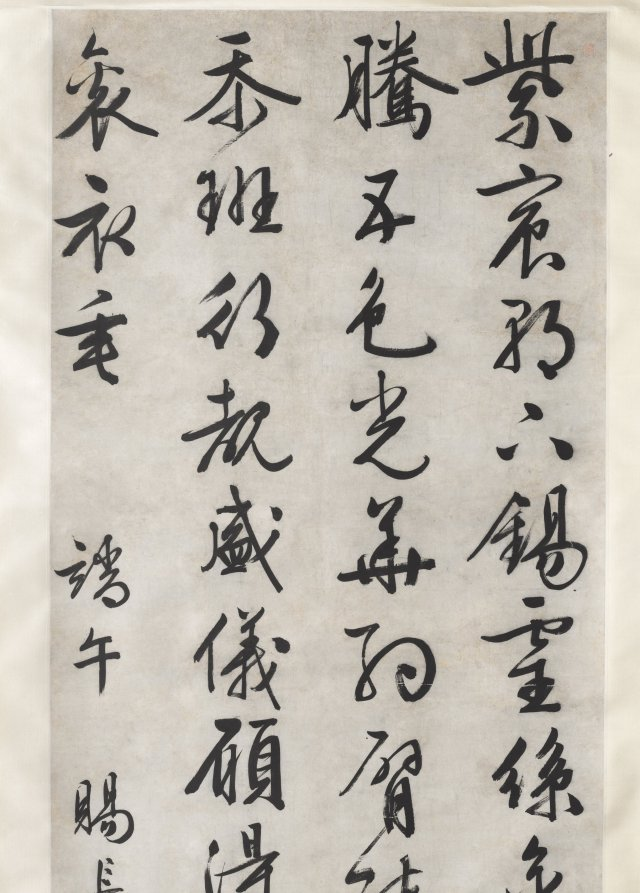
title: Poem on Imperial Gift of an Embroidered Silk: Calligraphy in Running-Standard Script (xingkaishu)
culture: China, Suzhou, Ming dynasty (1368-1644)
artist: Wen Zhengming (Chinese, 1470–1559)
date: c. 1525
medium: Hanging scroll; ink on paper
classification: Calligraphy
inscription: The text of the calligraphy, which is also included in Wen Zhengming's literary compilation, can be translated as follows: From the throne, this exquisite silk was bestowed on me,/ As I expressed my gratitude to His Majesty by the Goldwater Bridge./ This heavenly silk is embroidered with five colors./ Resplendent it is, draping over my arm with [designs of] twin dragons./ Having received such a gift, I [bowed] in shame over my lack of achievements./ Humbly I returned to my rank to observe the grand ceremony./ I wish His Majesty shall live on for myriad years,/ And the sun will always shine upon His trailing robe.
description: A poem by the influential Wen Zhengming from Suzhou in southeastern China expresses Wen’s gratitude to the Jiajing emperor (reigned 1522–67) for a gift of embroidered silk bestowed in appreciation of his commendable service. The elegant, well-composed, and energetically written large characters in deep black ink reflect the handwriting of a distinguished scholar-artist. Works of calligraphy by Wen of this large scale are rare. The poem reads: As I expressed my gratitude to His Majesty by the Goldwater Bridge. This heavenly silk is embroidered with five colors. Resplendent it is, draping over my arm with [designs of] twin dragons. Having received such a gift, I [bowed] in shame over my lack of achievements. Humbly I returned to my rank to observe the grand ceremony. I wish His Majesty shall live on for myriad years, And the sun will always shine upon His trailing robe.